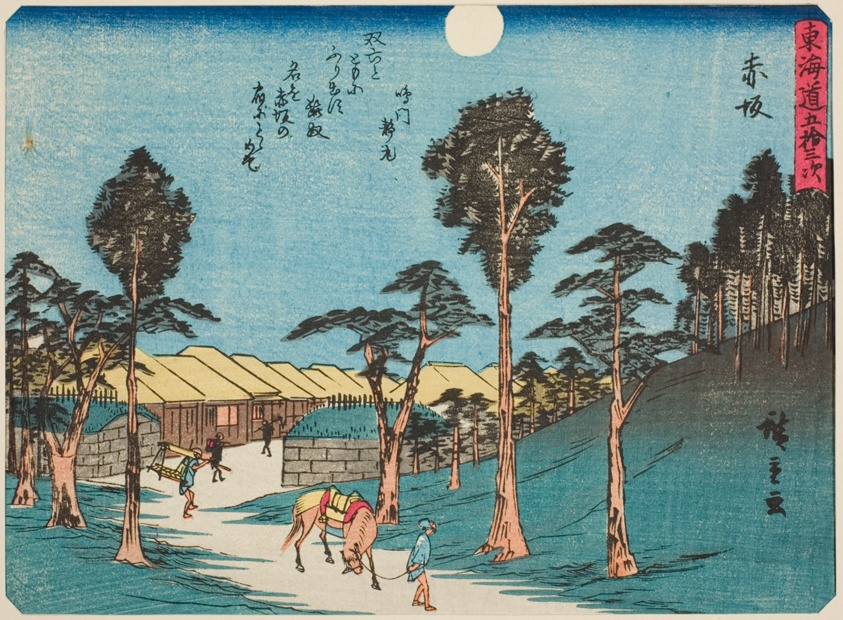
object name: Print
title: Akasaka, from the series "Fifty-three Stations of the Tokaido (Tokaido gojusan tsugi)," also known as the Tokaido with Poem (Kyoka iri Tokaido)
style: Japanese (culture or style)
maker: Utagawa Hiroshige 歌川 広重; Japanese, 1797-1858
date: c. 1837/42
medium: Color woodblock print; chuban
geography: Japan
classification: woodblock print; print; asian art